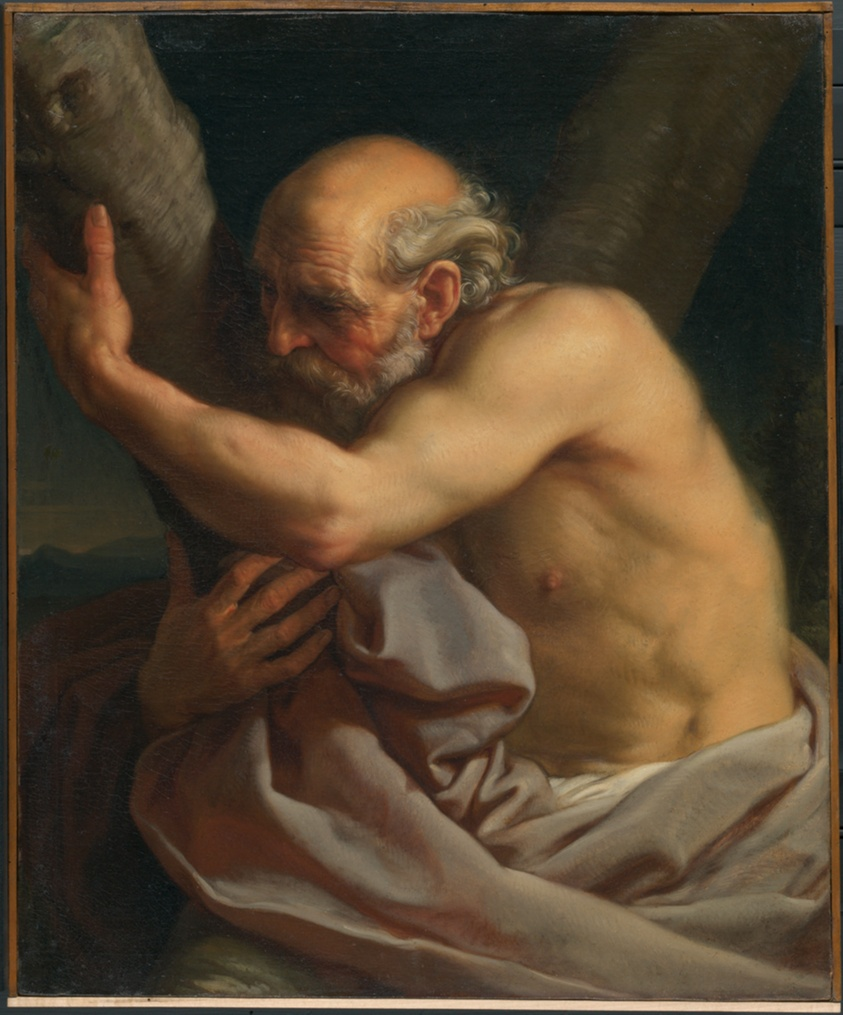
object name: Painting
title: Saint Andrew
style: 18th Century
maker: Pompeo Girolamo Batoni (Italian, 1708–1787)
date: 1740–43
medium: Oil on canvas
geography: Italy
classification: oil on canvas; Italian; oil; paint; painting; european painting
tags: biblical, New Testament, man, Christianity, Christian subjects, saints